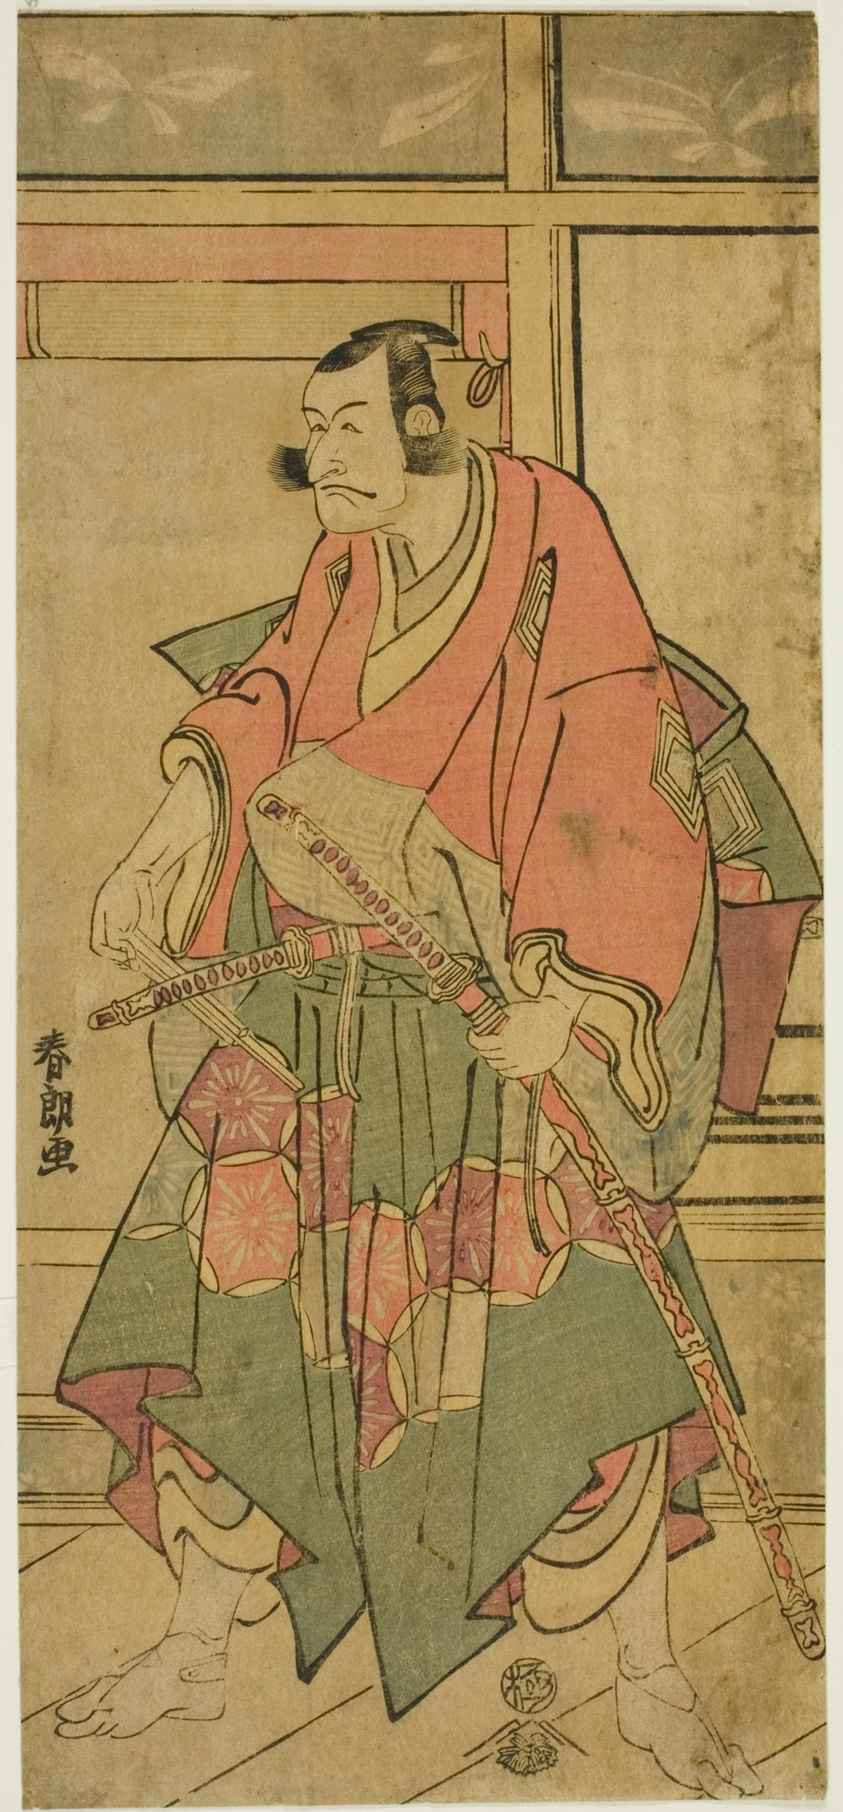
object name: Print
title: Ichikawa Danjuro VI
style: Japanese (culture or style)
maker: Katsushika Hokusai 葛飾 北斎 (signed Shunro); Japanese, 1760-1849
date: c. 1792/93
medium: Color woodblock print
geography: Japan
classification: woodblock print; print; asian art